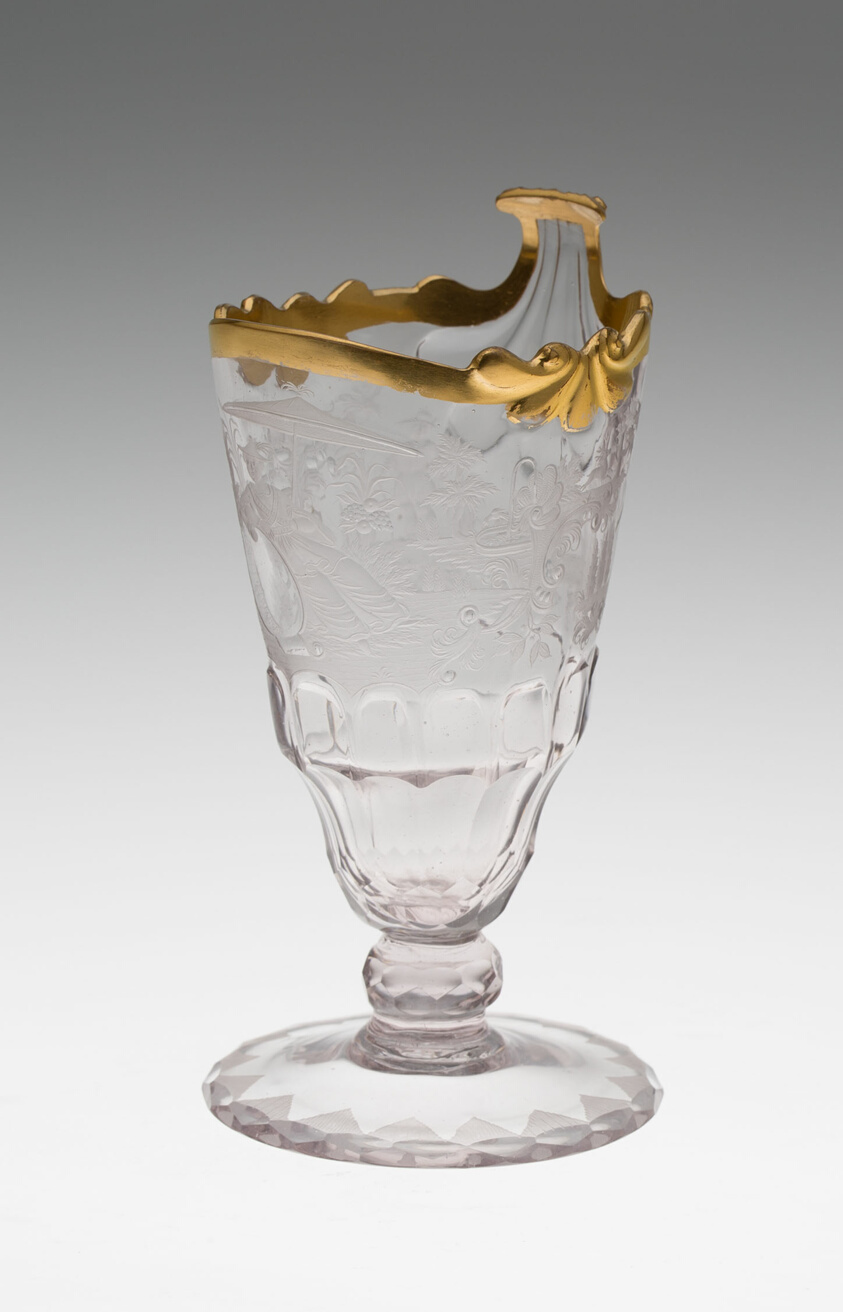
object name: Glass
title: Cup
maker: Silesia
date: c. 1760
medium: Glass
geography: Silesia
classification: drinking vessel; earthenware; european decorative arts; ceramics; glass